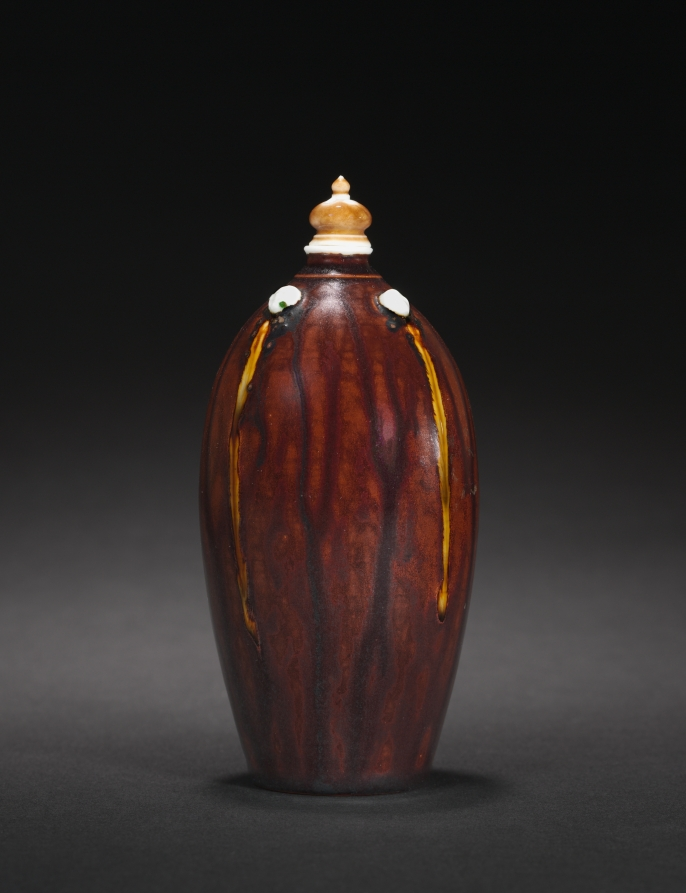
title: Covered Vase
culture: France, 20th century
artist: Sèvres Porcelain Factory (French, est. 1756)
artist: Taxile Maximin Doat (French, 1851–1939)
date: 1901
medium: porcelain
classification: Ceramic